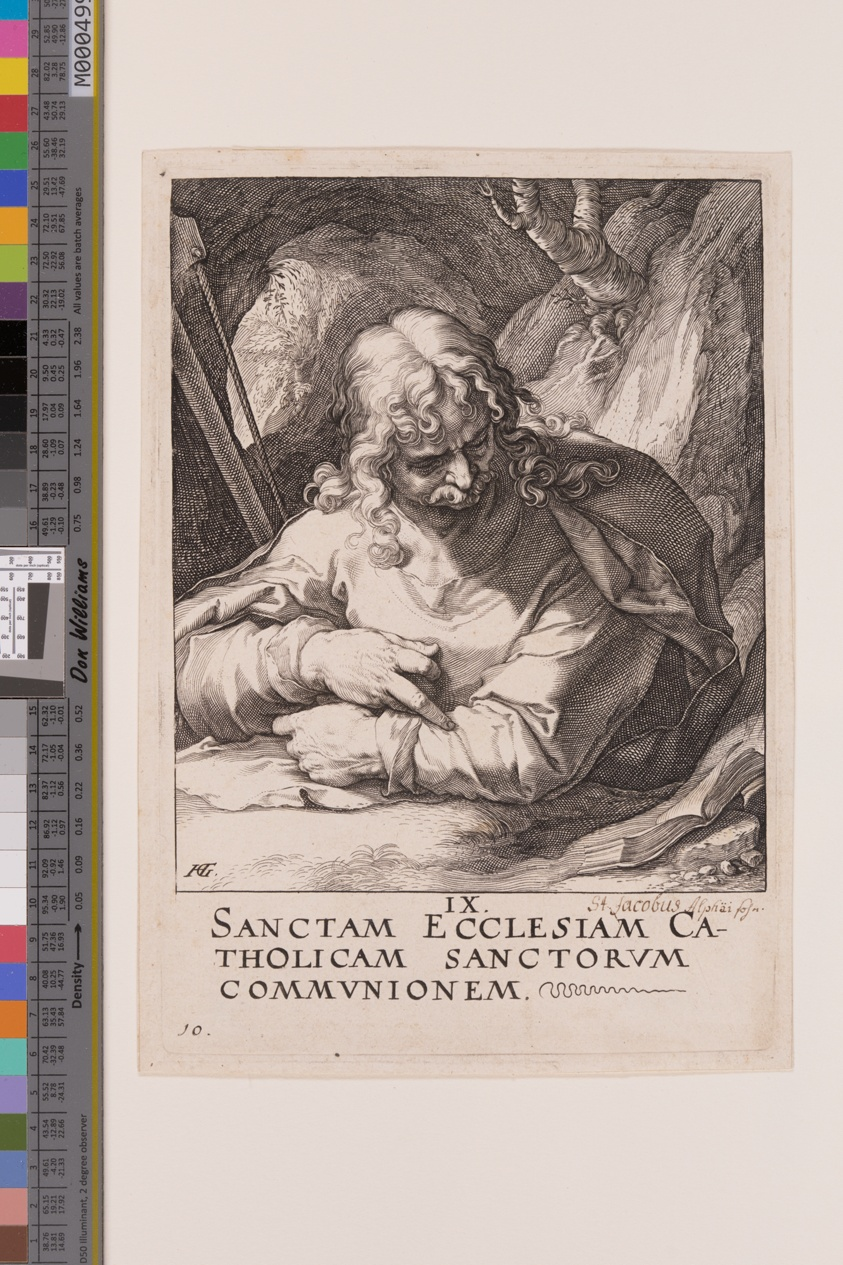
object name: Print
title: St James the Less, from Christ, the Apostles and St Paul with the Creed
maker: Hendrick Goltzius (Dutch, 1558–1617)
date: 1589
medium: Engraving on ivory laid paper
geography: Netherlands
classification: engraving; paper; print; prints and drawing